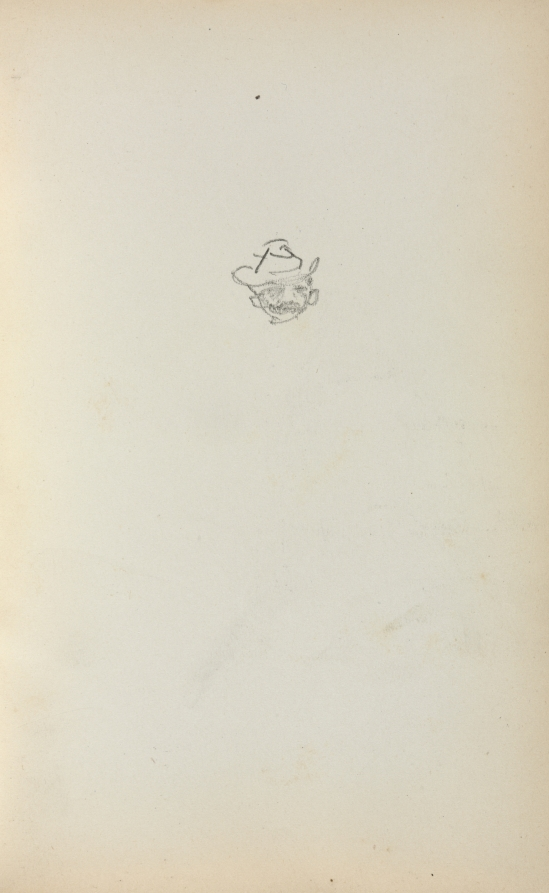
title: Italian Sketchbook: Head of a Man (page 223)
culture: America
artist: Maurice Prendergast (American, born Newfoundland [now Canada], 1858–1924)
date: 1898–1899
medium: pencil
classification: Bound Volume